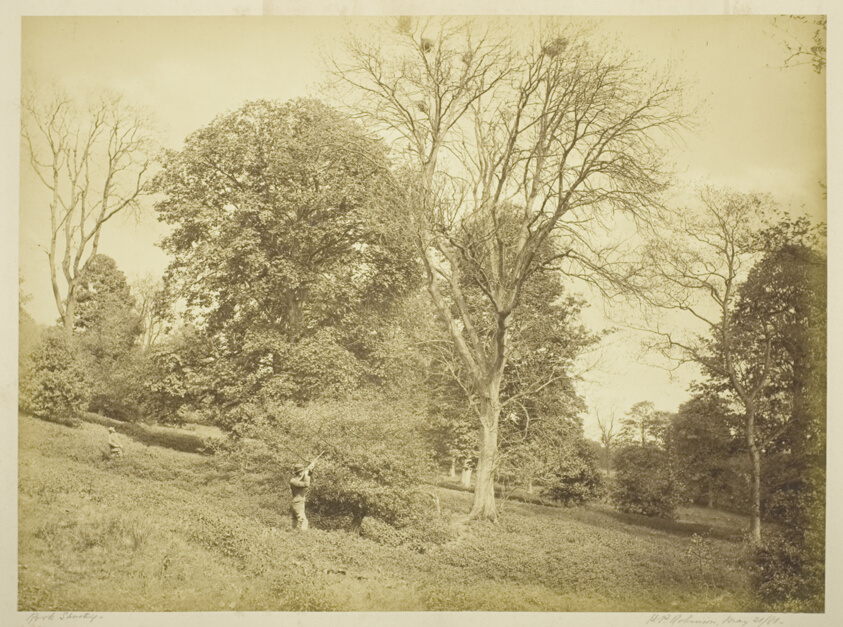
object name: Photograph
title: Rook Shooting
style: 19th century, Pictorialism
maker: Henry Peach Robinson (English, 1830–1901)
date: May 21, 1881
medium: Albumen print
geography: England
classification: albumen silver print; photographic process; photography; photograph